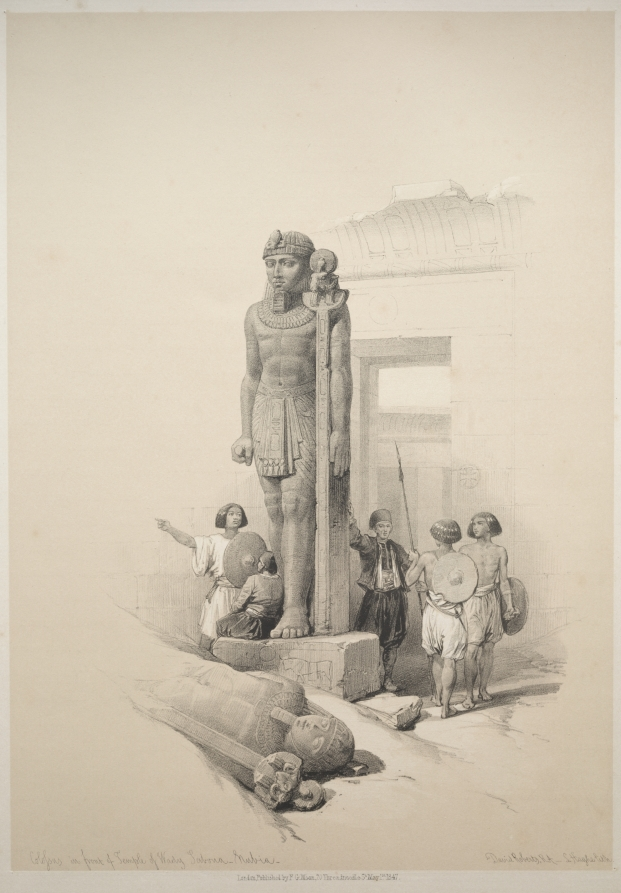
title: Egypt and Nubia: Volume II - No. 7, Colossi at Wady Saboua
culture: England, 19th century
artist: Louis Haghe (British, 1806–1885)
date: 1838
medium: color lithograph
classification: Print